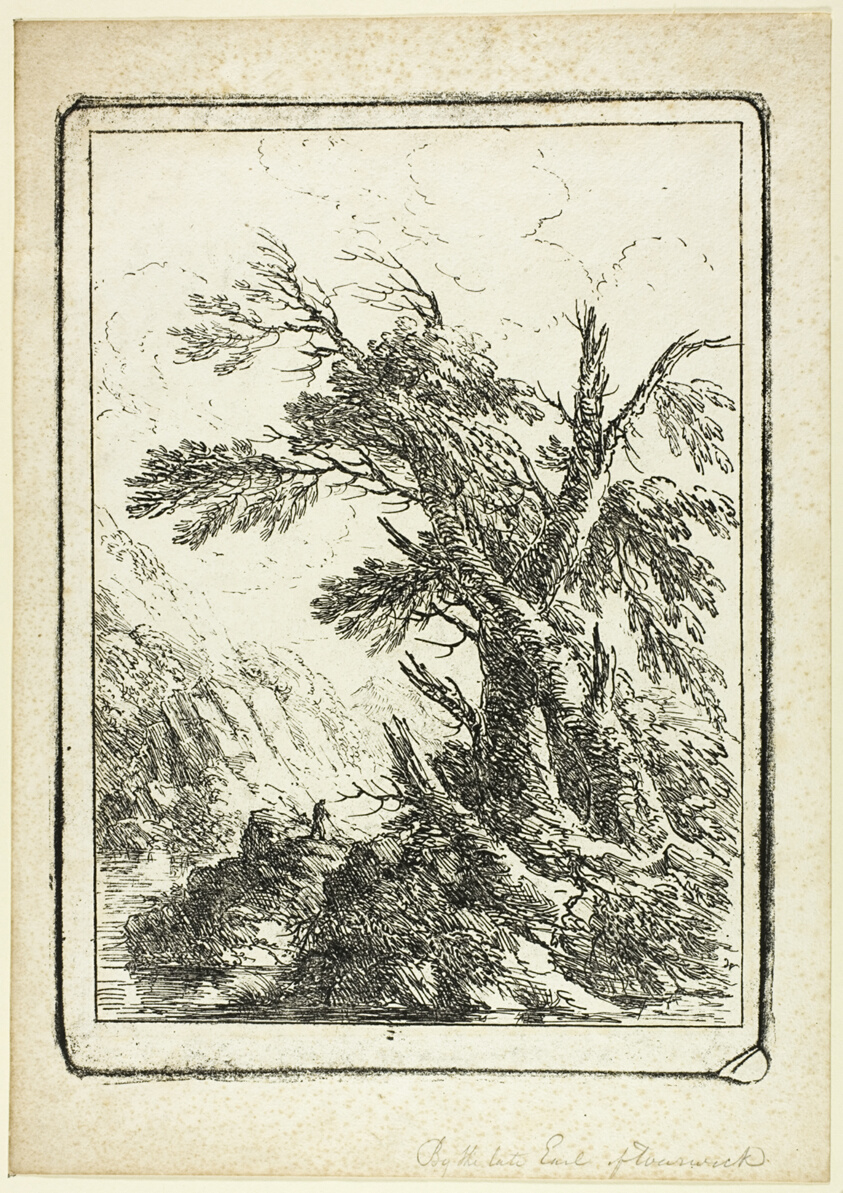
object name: Print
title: Landscape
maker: Henry Richard Greville, 3rd Earl of Warwick; English, 1779-1853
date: 1803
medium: Lithograph on ivory wove paper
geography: England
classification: lithograph; print; prints and drawing